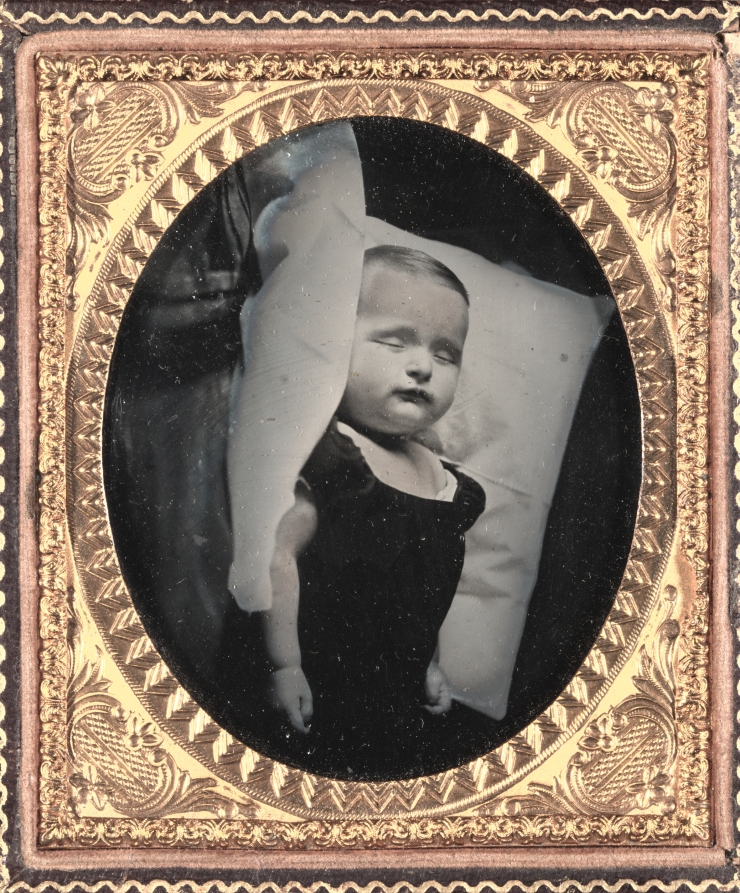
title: Post-Mortem on Pillow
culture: America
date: c. 1855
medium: ambrotype, tinted, sixth plate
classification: Photograph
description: Children have always been particularly cherished subjects for photography. Portraits were made to preserve the memory of their stages of growth and, in an age when long-distance travel was rare, to share with faraway relatives. And, for a sadder reason: in 1840 an estimated one-third of children died before age five. Photography offered grieving parents the opportunity to immortalize their children’s features. This tragic genre of photographs, later called “post-mortems,” often depicts the children in fine clothing, laying down with eyes shut, as if merely napping.